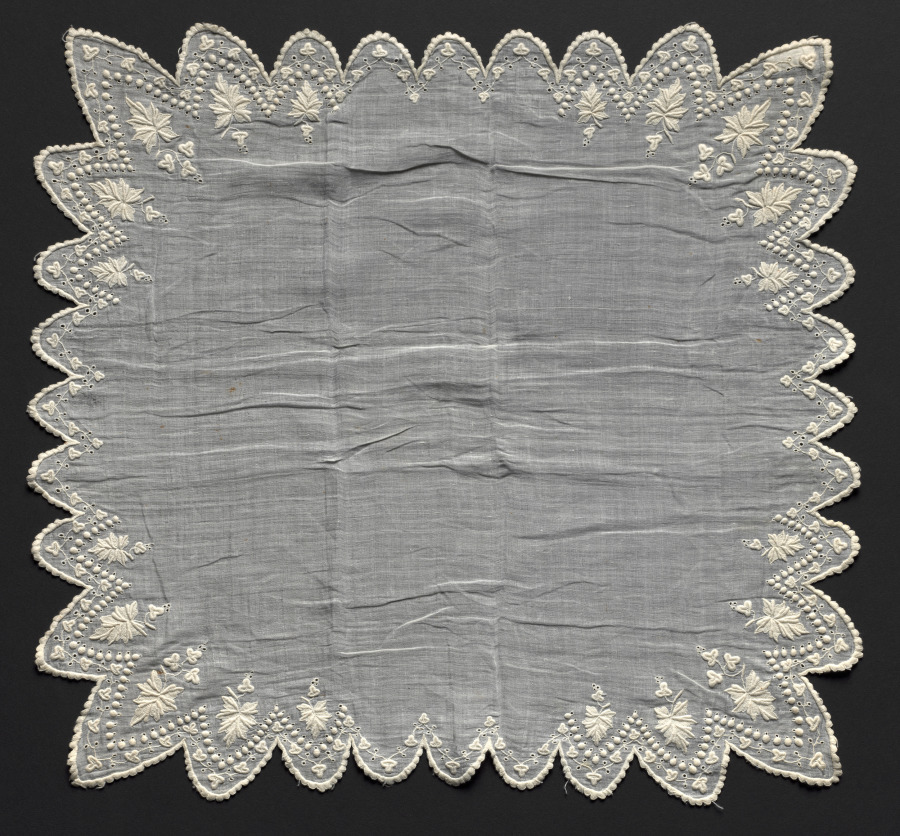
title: Handkerchief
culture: France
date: 1800s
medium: Plain weave linen; cotton embroidery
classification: Embroidery